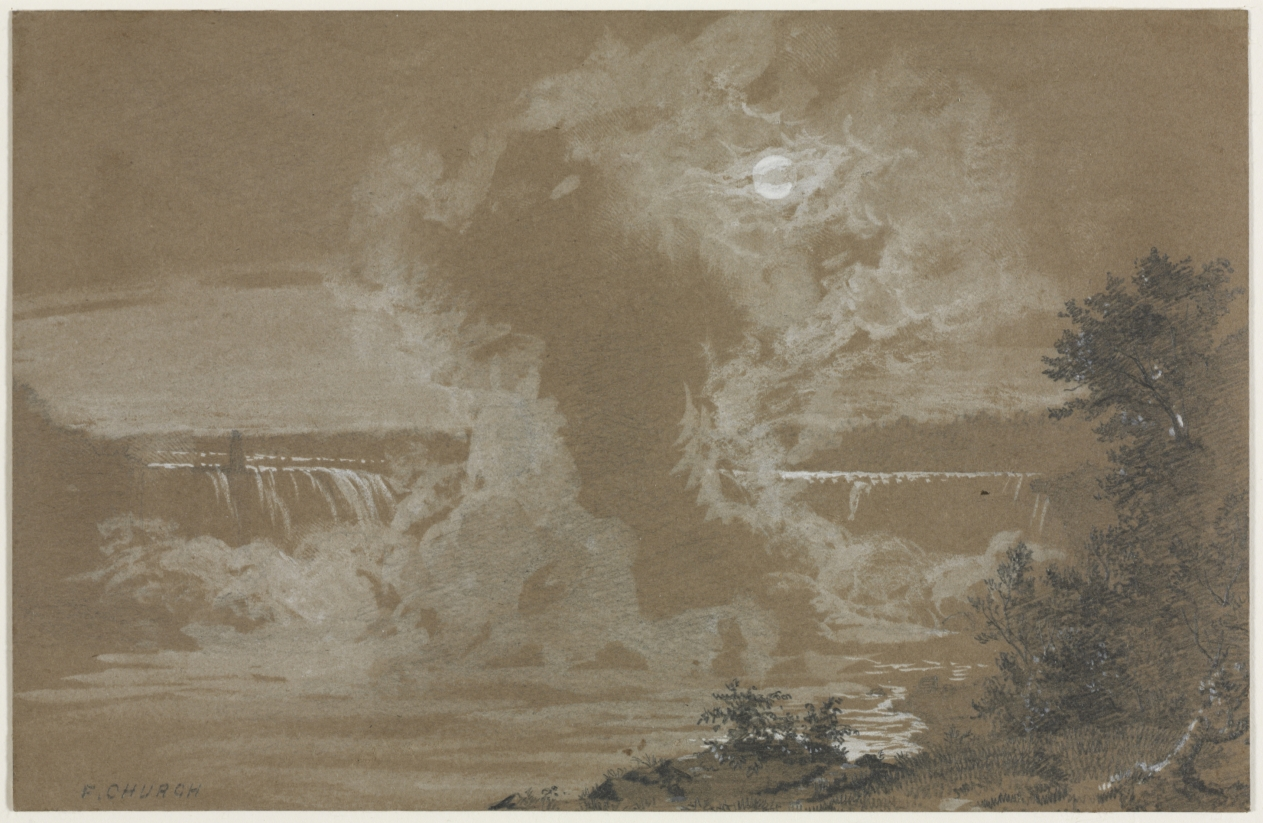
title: Niagara Falls by Moonlight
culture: America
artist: Frederic Edwin Church (American, 1826–1900)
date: probably 1856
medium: graphite and white gouache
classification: Drawing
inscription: signed?, lower left, in graphite: f. church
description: By the time Frederic E. Church executed this study of the Canadian side of Horseshoe Falls, Niagara Falls was already an icon of both American art and the American nation. Tourists and artists flocked to the falls in pursuit of a firsthand experience of the sublime, a sensation of elation and terror that portrayals of Niagara Falls had notorious difficulty reproducing. Church’s celebrated oil painting The Great Fall, Niagara (1857) was one of the few depictions believed to capture the fall’s power in pictorial terms. Like many artists of the Hudson River School, Church used drawings made on site to preserve the visual memory of the place he intended to paint in oil. Cleveland’s sheet was possibly executed during one of the four trips he took to the falls in 1856 to prepare for Niagara. As a night scene, this study in light and shadow is unusual among Church’s drawings. The dark brown paper enhances the image’s nocturnal quality and allowed Church to render the atmospheric effects of mist and clouds. He used white gouache not only as a highlight, but also to define the luminous forms of water and vapor, crafting the landscape’s substance out of negative and positive space. On the picture’s left-hand side, Church represented the man-made Terrapin Tower in shadowy miniature, a testament to his interest in site-specific details—and also, perhaps, a reminder of the diminutive status of human creation in the face of awesome natural forces.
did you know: In this drawing, Church manipulates negative space—the space around and between his drawn subjects—to suggest the forms of water and smoke.